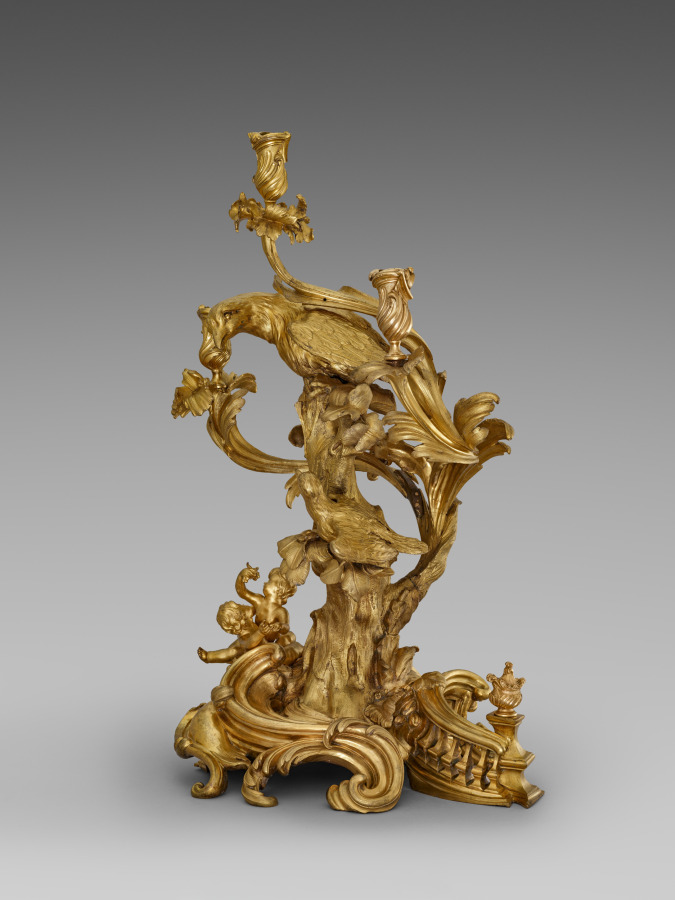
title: Candelabrum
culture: France, 18th century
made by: probably by Jean Joseph de Saint-Germain (French, 1720–1791)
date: c. 1750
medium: gilt bronze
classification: Furniture and woodwork